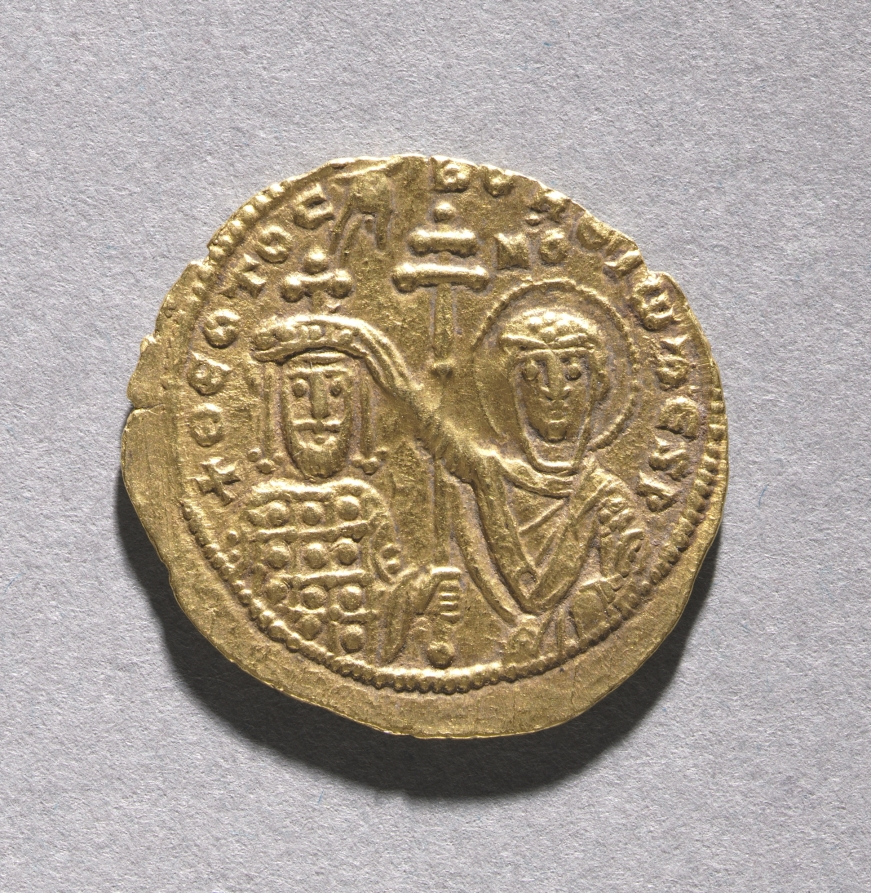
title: Nomisma with John I Zimisces (reverse)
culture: Byzantium, Constantinople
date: 969–976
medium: gold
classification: Coins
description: The vast number of surviving Byzantine coins attests to the level of trade across the empire. Controlled and supervised by the emperor, the producers of coins took care to represent his authority and reflect his stature. Talented artists were recruited to engrave the dies (molds) used for the striking of coins. Emperors increasingly came to include their heirs and co-emperors on their coinage, as well as other family members or even earlier rulers. Coins were recognized, then as now, as small, portable works of art. With their inscriptions and images, Byzantine coins provide valuable documentation of historical events and a record of the physical appearance of the emperors. The coins shown here include the solidus, the basic gold coin of 24 karats; the tremissis, a gold coin of one-third the weight and value of the solidus; and the nomisma, which in the 10th century replaced the solidus as the standard gold coin.